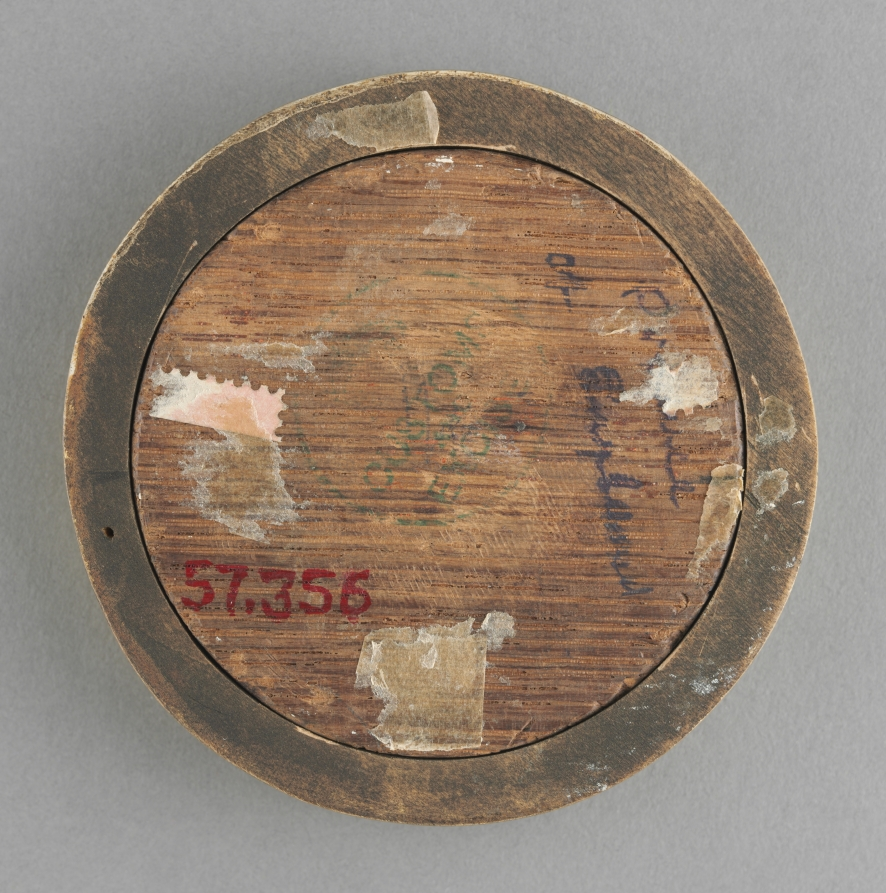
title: Sir Thomas More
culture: Germany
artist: follower of Hans Holbein the Younger (German, active England and Switzerland, 1497/98–1543)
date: 1600s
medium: oil on wood in a gilt wood frame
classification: Portrait Miniature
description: One of the most original of Renaissance thinkers, an influential politician at the court of Henry VIII, and, since 1935, a saint in the Roman Catholic Church, Sir Thomas More also played an important role in the development of English portraiture through his patronage of Hans Holbein the Younger. Here More wears a so-called livery chain, a mark of his service to Henry VIII. He would eventually be beheaded in 1535, when he refused to support the king’s divorce and breach with the Catholic church. This miniature painted by a later follower of Holbein attests to the enduring resonance of More’s image and legacy.